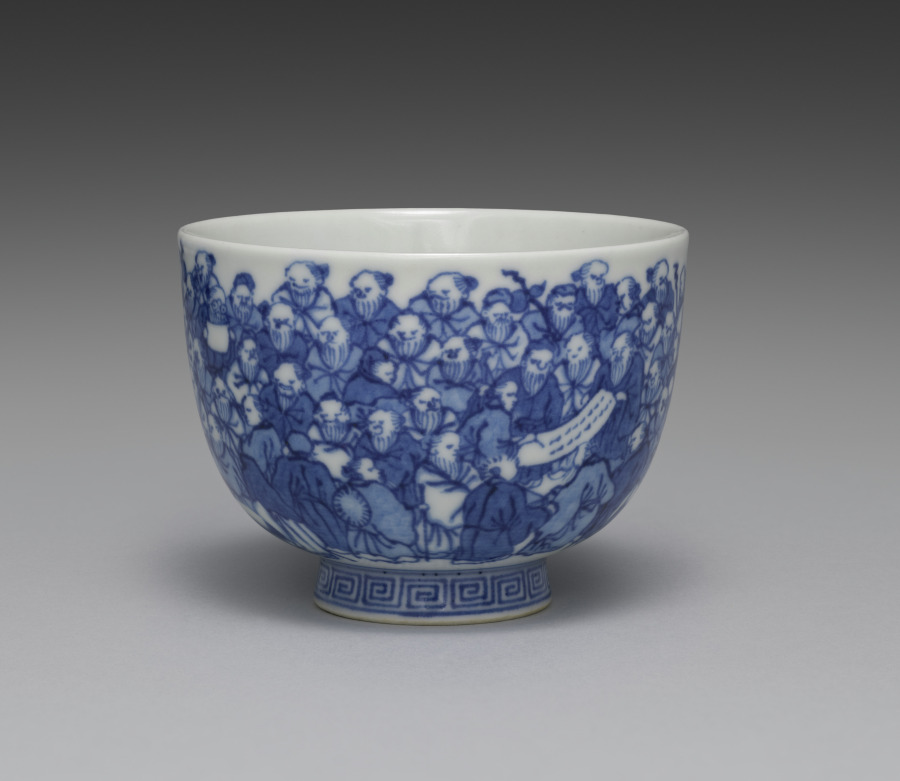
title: Teacup from Teacups with a Hundred Sages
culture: Japan, Meiji period (1868–1912)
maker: Seifū Yohei III (Japanese, 1851–1914)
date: 1893–1914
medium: One from a set of five teacups; porcelain with underglaze blue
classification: Ceramic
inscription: 清風造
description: Each of these five teacups has a painting of identical design in underglaze blue, but as the tiny figures are drawn entirely by hand, each cup has its own personality. The theme of the sencha cups is an assembly of sages or immortals, literally “a hundred venerable [people]” (hyakurō). The myriad figures crowd the scene in groups. The god of longevity, with his tall forehead, sits with his cranes, having flown in from Mt. Penglai on the Isle of the Immortals. Seven long-bearded sages sit around a stone table, chatting and drinking; one is seated on an enormous gourd. Of course, there is a stack of books on the table, and elsewhere, scrolls are being written upon or read—in one case held very close by a sage who is wearing glasses. The design was enormously popular in ceramics made for those engaged in literati culture.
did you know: Seifū Yohei III (1851–1914) produced many works for tea gatherings where people drank Chinese-style leaf-tea (sencha).